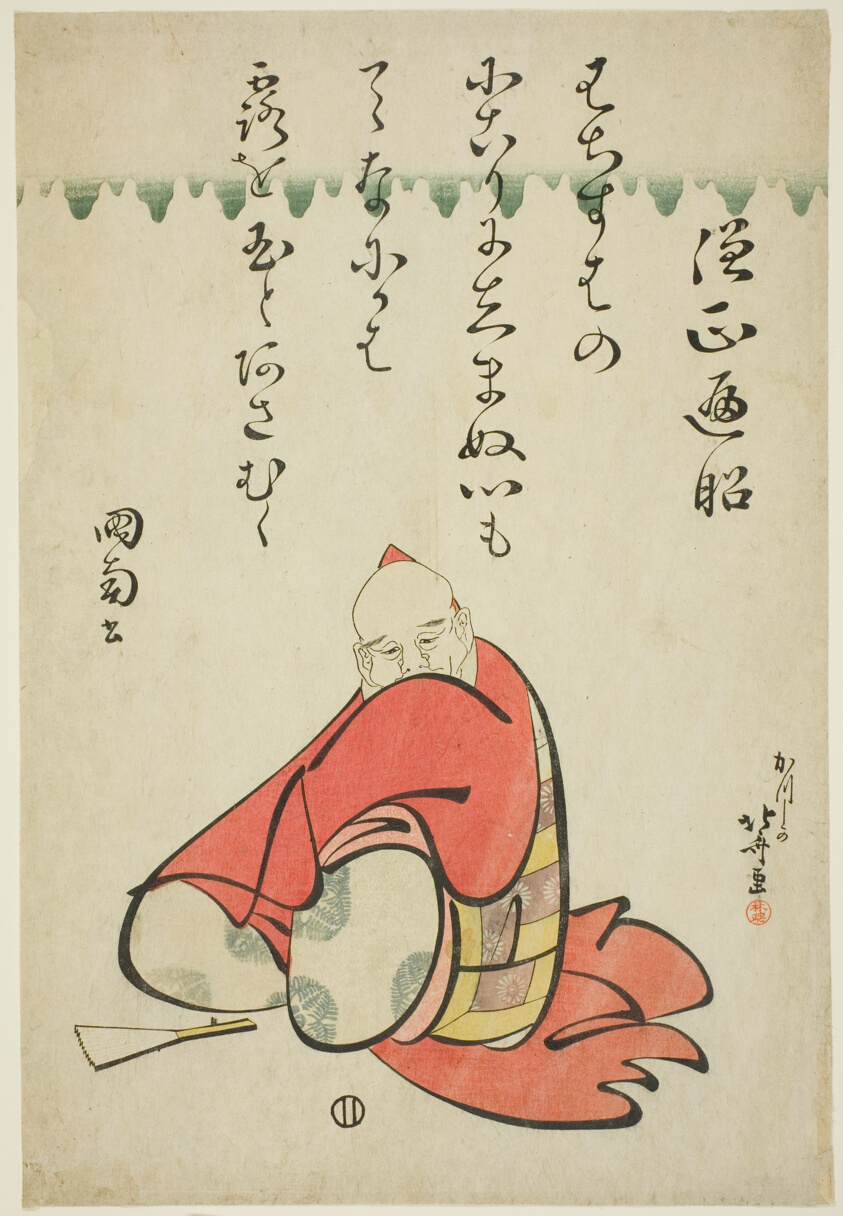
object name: Print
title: The Poet Sojo Henjo, from the series Six Immortal Poets (Rokkasen)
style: Japanese (culture or style)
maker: Katsushika Hokusai 葛飾 北斎; Japanese, 1760-1849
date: c. 1810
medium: Color woodblock print; oban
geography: Japan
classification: woodblock print; print; asian art